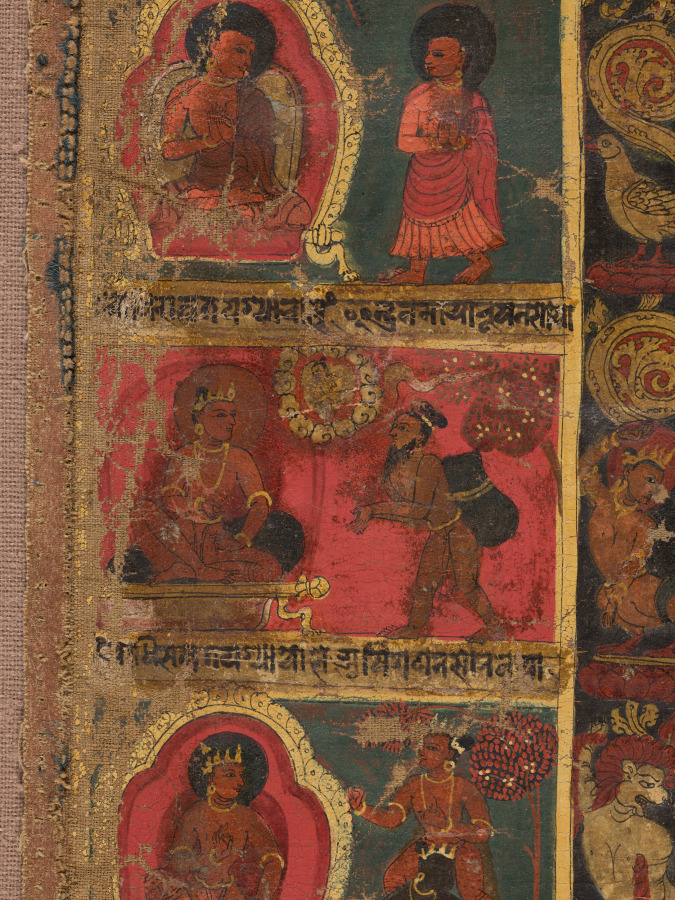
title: Bejeweled Buddha Preaching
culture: Nepal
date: 1648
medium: Gum tempera, ink, and gold on cloth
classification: Painting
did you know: Nepalese devotional paintings on cloth are called "paubha" in the Newari language.